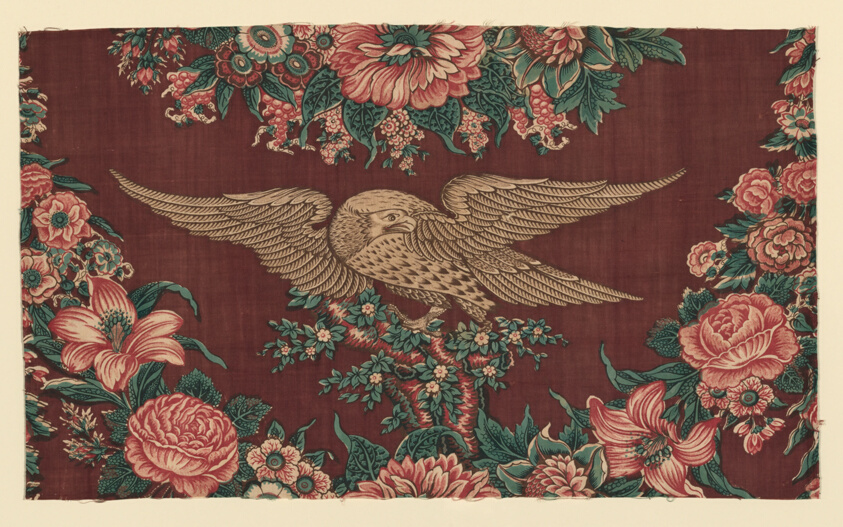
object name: Textile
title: Fragment (Furnishing Fabric)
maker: England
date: 1830/40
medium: Cotton, plain weave; engraved roller and block printed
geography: England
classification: textile; weaving - printed; furnishing textile